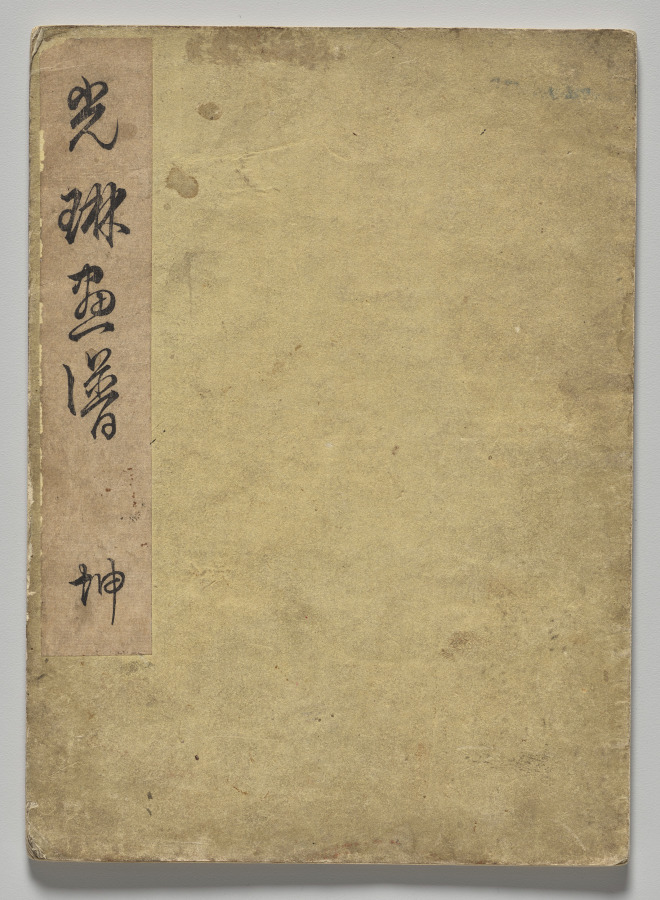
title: The Kōrin Picture Book (Volume 1)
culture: Japan, Edo period (1615–1868)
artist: Nakamura Hōchū (Japanese, d. 1819)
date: 1800s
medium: one of a set of two woodblock printed folding-books; ink and color on paper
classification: Bound Volume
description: Ogata Korin (1658-1716) was one of the most admired artists of Rimpa, or "decorative school painting." These books by the charming later-generation Rimpa artist Hochu record Korin's inventive designs.